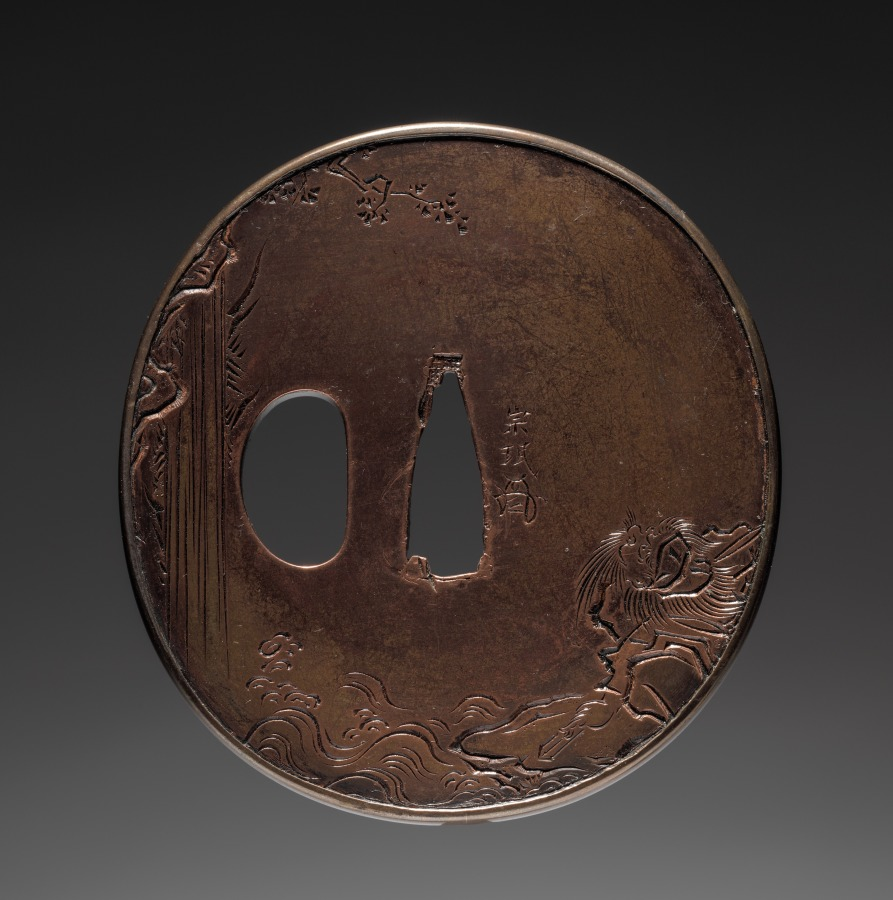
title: Sword Guard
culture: Japan, Edo period (1615–1868)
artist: Somin (Japanese)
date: early 1800s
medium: bronze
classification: Arms and Armor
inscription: Signature: Somin